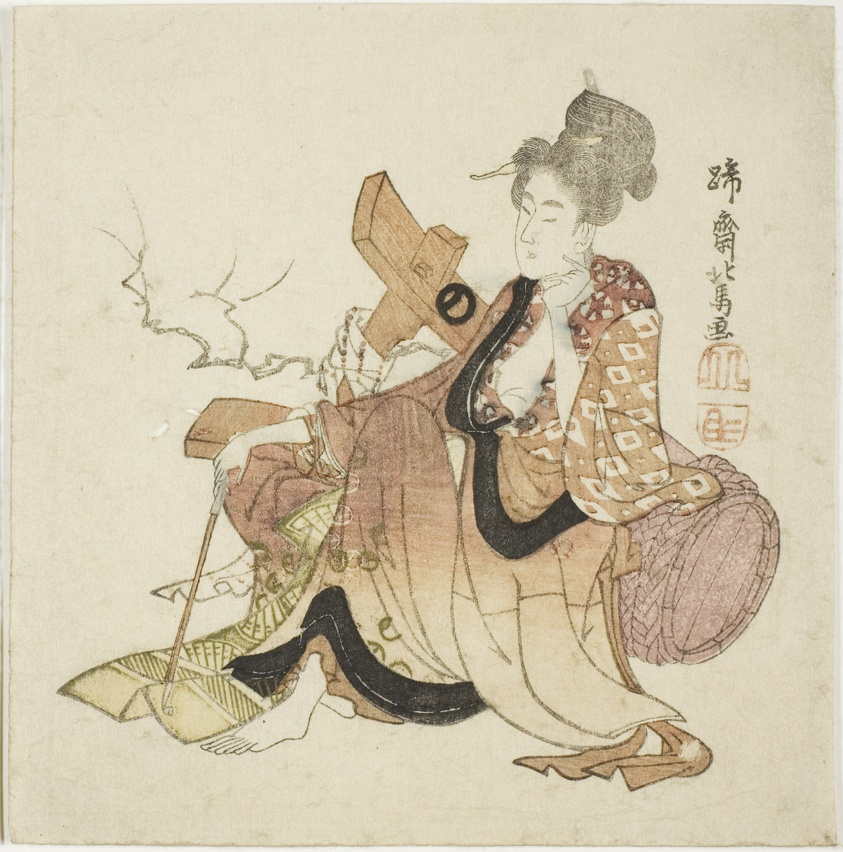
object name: Print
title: Woman leaning against wine cask, from an untitled series of Eight Immortals of the Wine Cup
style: Japanese (culture or style)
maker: Teisai Hokuba (Japanese, 1771-1844)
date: early 1800s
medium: Color woodblock print; surimono, trimmed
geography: Japan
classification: woodblock print; print; asian art